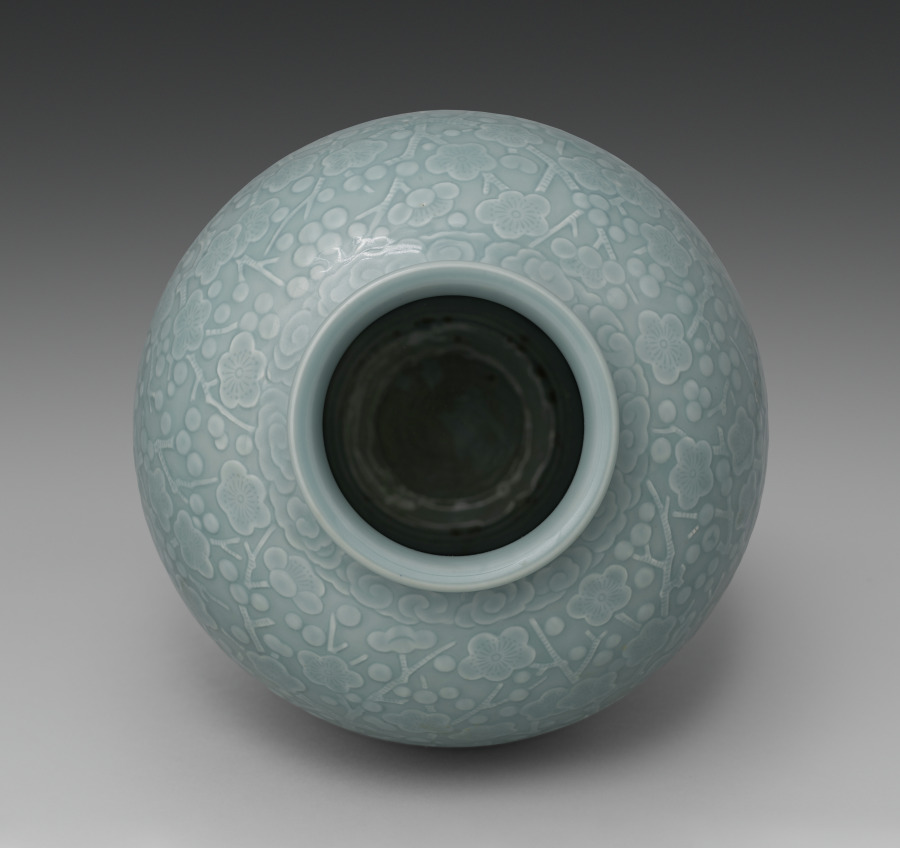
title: Vase with Plum Blossoms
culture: Japan, Taishō period (1912–26) or Shōwa period (1926–89)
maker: Seifū Yohei IV (Japanese, 1872–1951)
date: 1914–46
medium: Glazed porcelain with molded and carved design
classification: Ceramic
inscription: 清風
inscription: "James & Christine Heusinger/ Japanese Art Collection"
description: Although inspired by representations of flowering plum, or prunus, in Chinese ceramics, the dense allover design of branches on this vase also resembles Japanese textile patterns. As they might on a kimono, the trunks run in alternate directions up and down the surface. At the foot, or bottom of the vase, is a classic band of spirals, and at the neck, or narrowed portion near the opening, is a collar of clouds.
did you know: Yohei IV’s allover design of budding and flowering plum blossoms, strongly associated with spring and with China, is combined with his father’s “water color” glaze on this vase.